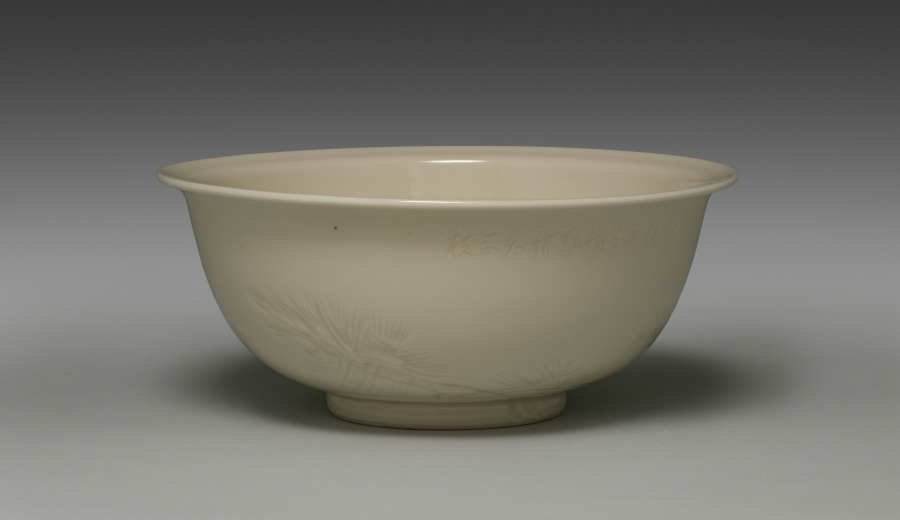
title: Bowl with Old Pine and Poem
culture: Japan, Taishō period (1912–26) or Shōwa period (1926–89)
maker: Seifū Yohei IV (Japanese, 1872–1951)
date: 1914–46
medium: Porcelain with molded and carved design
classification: Ceramic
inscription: 鶴樹君子風拂太平枝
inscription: 清風造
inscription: 清風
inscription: 成山清風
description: A grand, aged pine is carved into the body of this bowl. The inscription on the reverse side explains the tree’s presence. It is an altered version of two lines from a poem by Li Jiao (646?–715?) called “Pine.” Li Jiao was a senior government official who had a tumultuous career under the reign of Wu Zetian (r. 690–705), as well as those of her sons and grandson during the Tang dynasty (618–907). Although little known today, his work was read in Japan during the Heian (794–1185) and Kamakura periods (1185–1333). An anthology containing his poems, which was lost in China, was passed down across the generations in Japan. The translation of the inscription is as follows (the original characters, written and read from right to left, are shown below from left to right): The crane nests in the mastwood tree, the wind flicks at its peaceful branches. 鶴樹君子風拂太平枝 The mastwood is a pine-like evergreen, and the crane sheltering there is protected from the wind. In the original poem, the characters before “branches” (枝) are rather 大夫, meaning “high official.” This is likely a reference to the title bestowed upon a pine tree by the emperor Qin Shi Huang (r. 221–210 BCE) in thanks for its protection when a fierce rain fell as he ascended Mount Tai to pay his obeisance to the heavens.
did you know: The box inscription identifies the bowl's glaze as kanpakuyū, "bright-jewel white glaze."